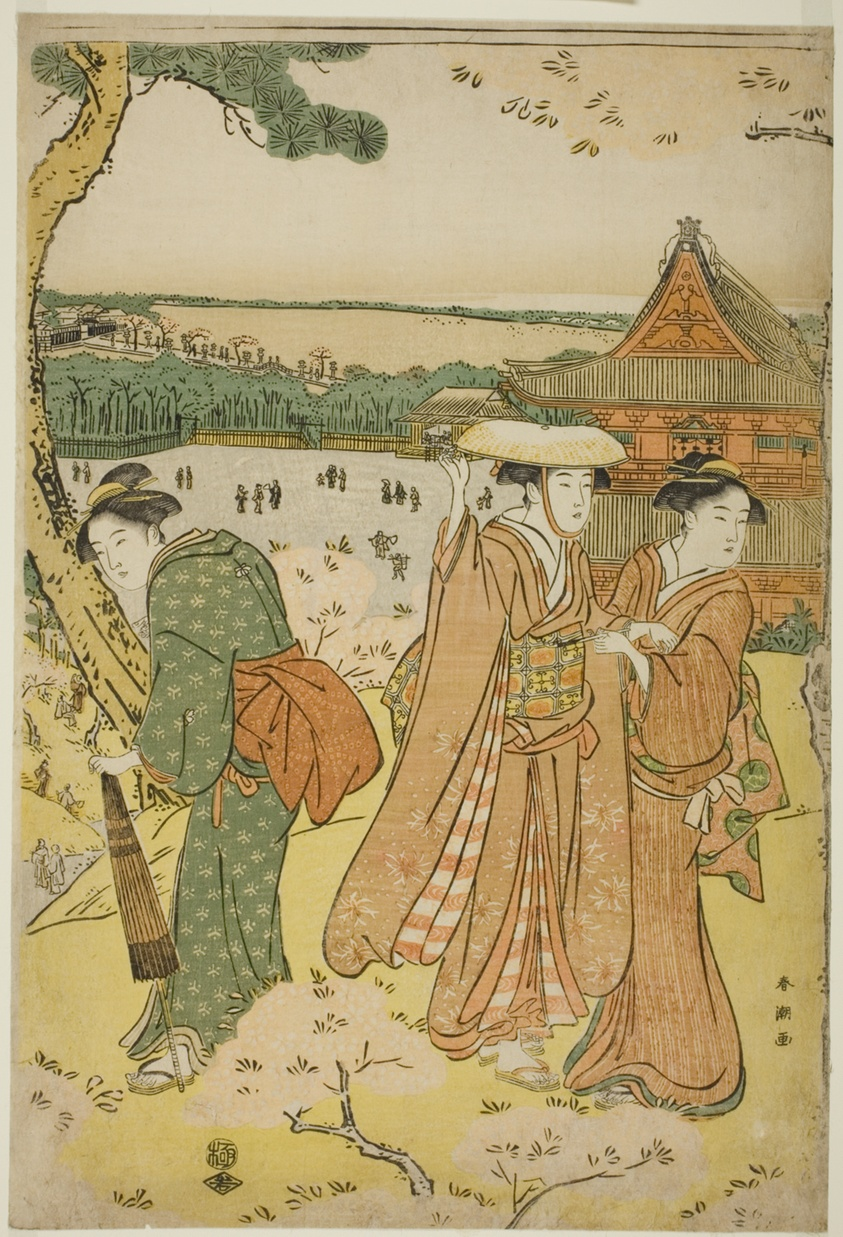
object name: Print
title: Viewing Cherry Blossoms at Ueno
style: Japanese (culture or style)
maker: Katsukawa Shuncho; Japanese, active c. 1780-1801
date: c. 1780/1801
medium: Color woodblock print; left sheet of oban triptych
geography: Japan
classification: woodblock print; print; asian art